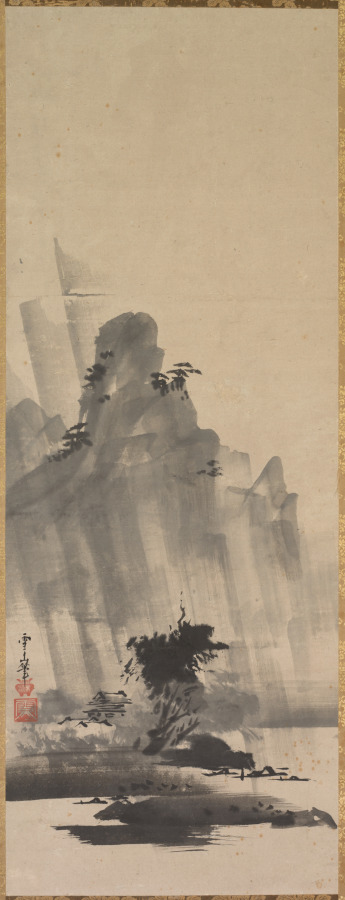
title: Mountain and River in Storm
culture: Japan, Edo period (1615–1868)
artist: Hirowatari Setsuzan (Japanese, ?-1674)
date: early to mid-1600s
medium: hanging scroll; ink on paper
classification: Painting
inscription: signed: Setsuzan hitsu